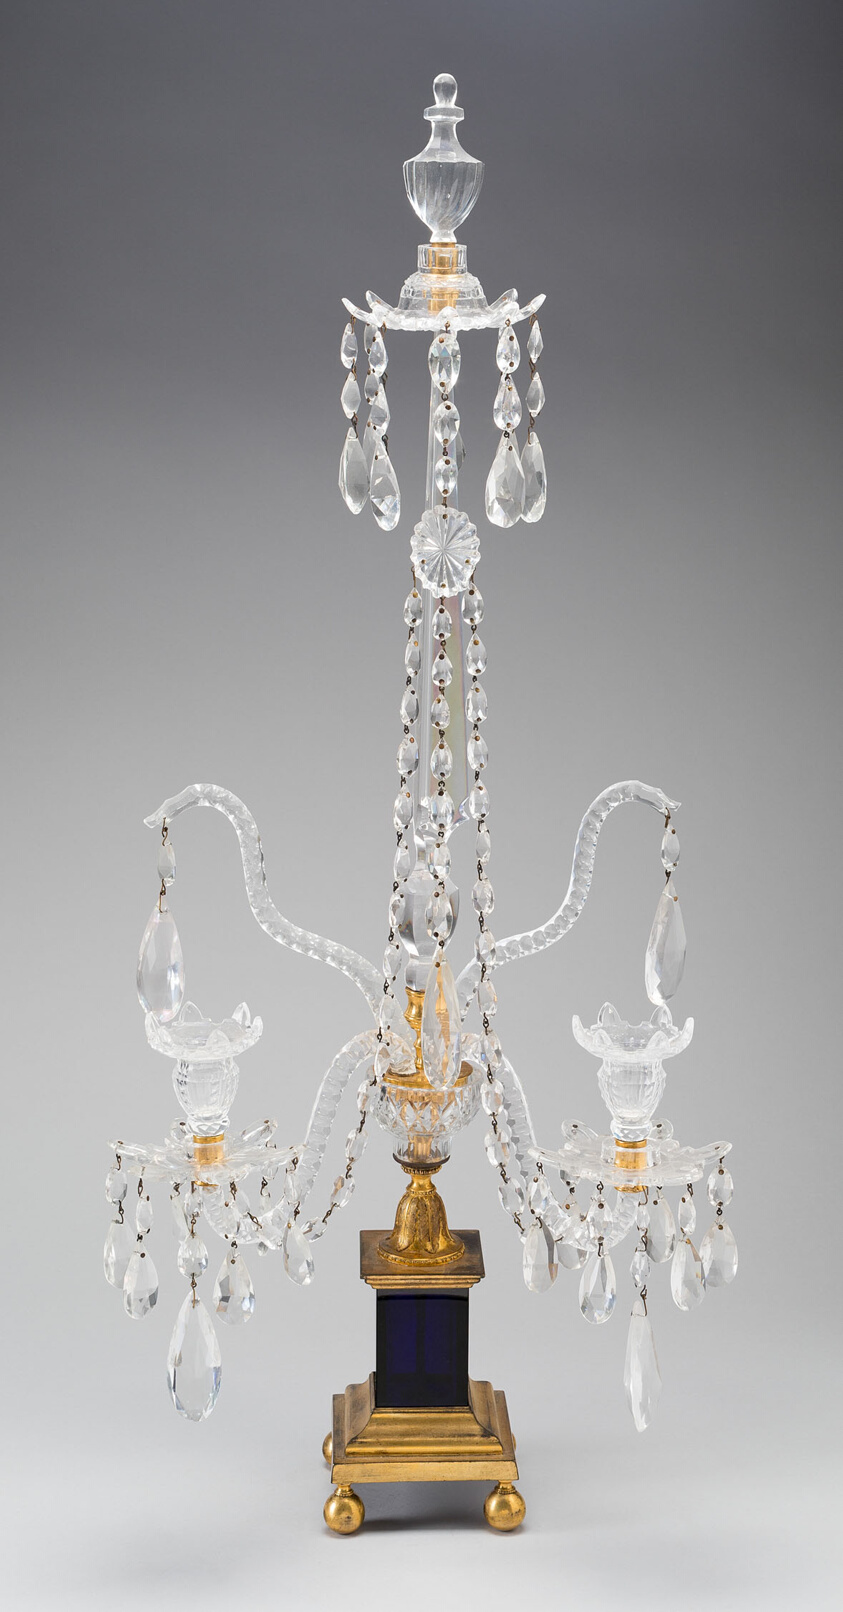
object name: Glass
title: Candelabra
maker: England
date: 1780/1800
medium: Glass; colorless and dark blue, blown and cut, gilded bronze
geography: England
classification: candleholder - candelabra; lighting device; furniture; european decorative arts; glass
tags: furniture